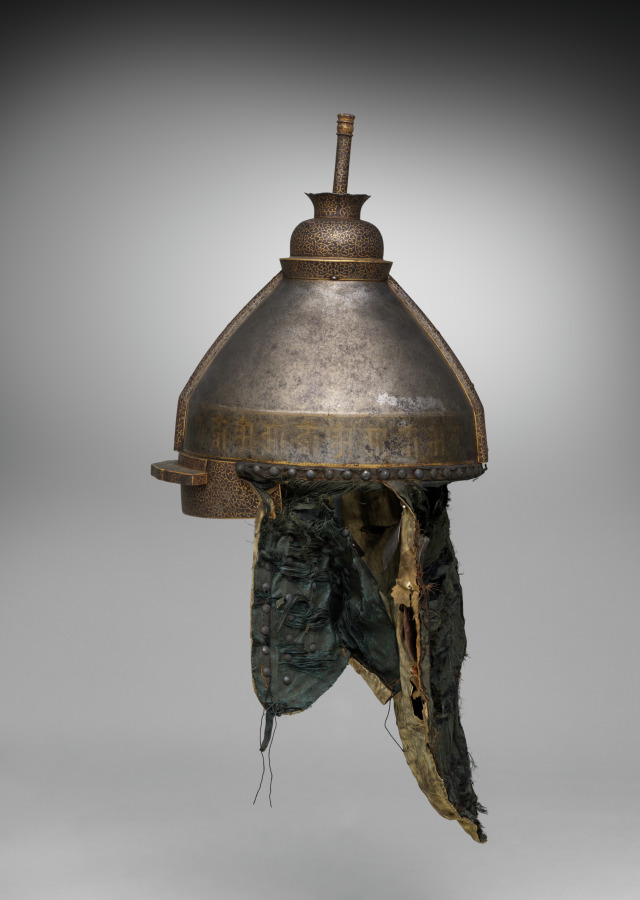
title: Helmet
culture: Sino-Tibetan, Ming dynasty (1368-1644)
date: 1368–1644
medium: iron inlaid with gold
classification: Arms and Armor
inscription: Tibetan inscription